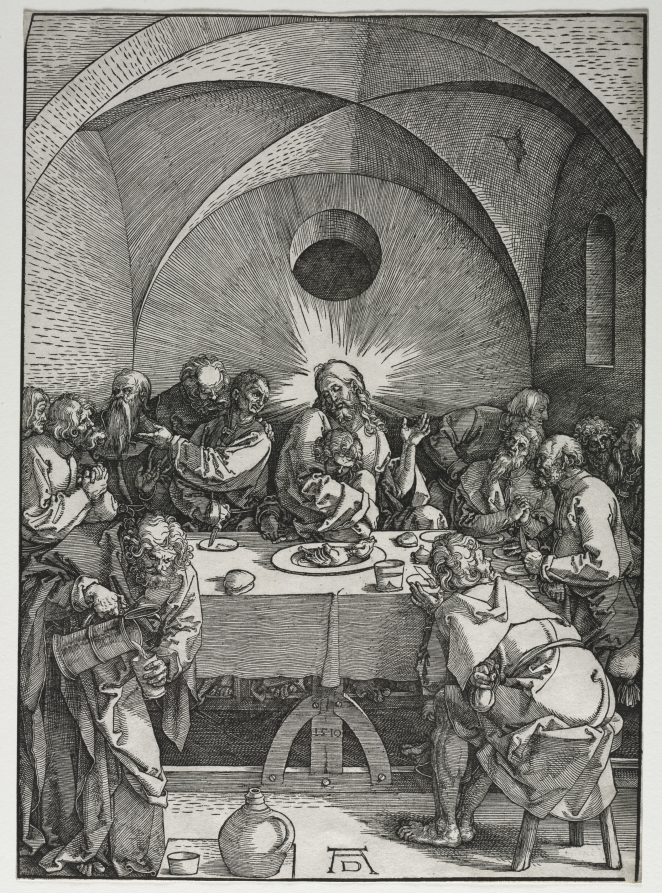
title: The Last Supper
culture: Germany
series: The Large Passion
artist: Albrecht Dürer (German, 1471–1528)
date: 1510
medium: woodcut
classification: Print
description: The Christian sacrament of the Eucharist is traced to the Last Supper, when Christ said of the wine, “This is my blood.” For artists, the scene was full of both symbolic and narrative potential. Albrecht Dürer created a compact, vertical composition that focuses on the closeness of the disciples and the moment, wine flowing, when Christ reveals his fate. Dürer’s ingenious woodcut technique includes the creation of a halo made from parallel lines around Christ’s head that continue outward to define the shadow of the vaulted room.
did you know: This print depicts the apostles dining on a humble but sturdy refectory table. Dürer included the date of the print on the middle trestle, a location often reserved for heraldry on more lavish tables.